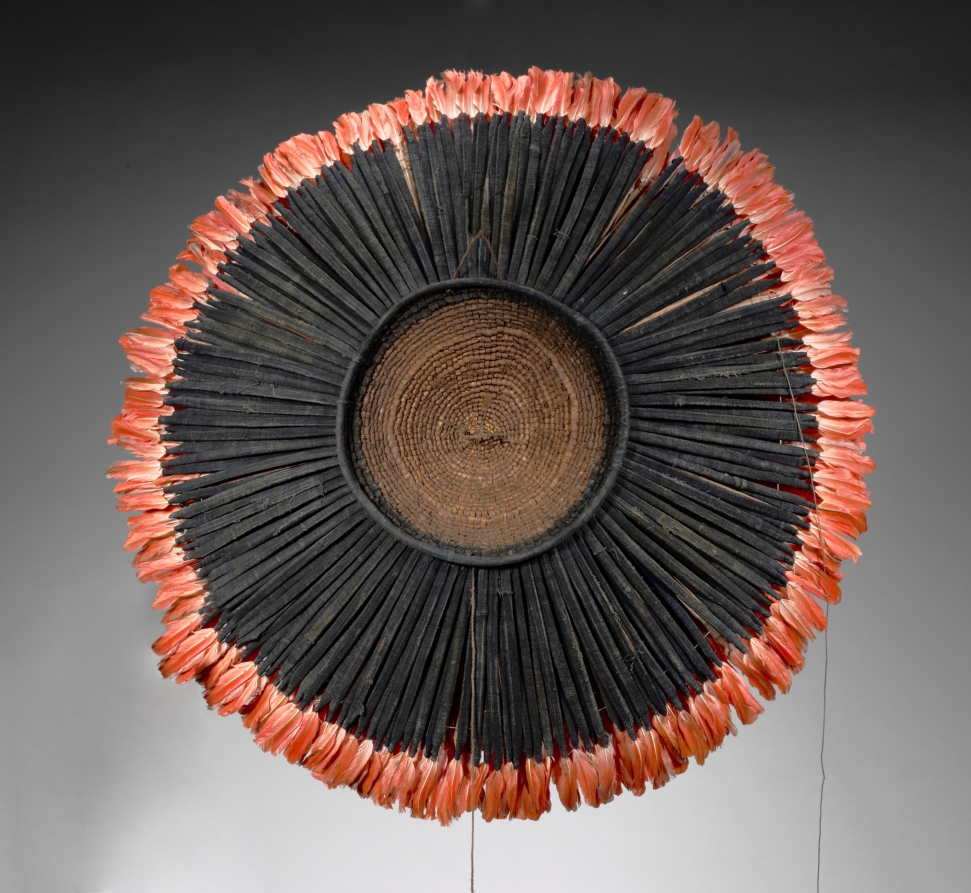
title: Headdress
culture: Africa, Central Africa, Cameroon, Grassfields region, Bamileke-style maker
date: 1900s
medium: African gray parrot feathers, wood, plant fiber, probably cotton, string, and colorant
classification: Garment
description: Hundreds of red tail feathers from the grey parrot (Psittacus erithacus) decorate this disk-shaped headdress. Only the king, some high-ranking individuals, and members of the all-male elephant society—known in different languages as Kuosi, Nekang, or Kem-ndze—wore this prestigious headgear at ceremonies and funerals. Typically, the headdress was worn pushed slightly back from the hairline. When used by members of the elephant society, it was accompanied by a cloth and glass bead mask (mbap mteng) in the shape of that animal, such as 1985.1082.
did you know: This headdress has an ingenious built-in storage system: it can be flipped inside out to encase the feathers within a rigid woven structure, protecting them during storage or travel.